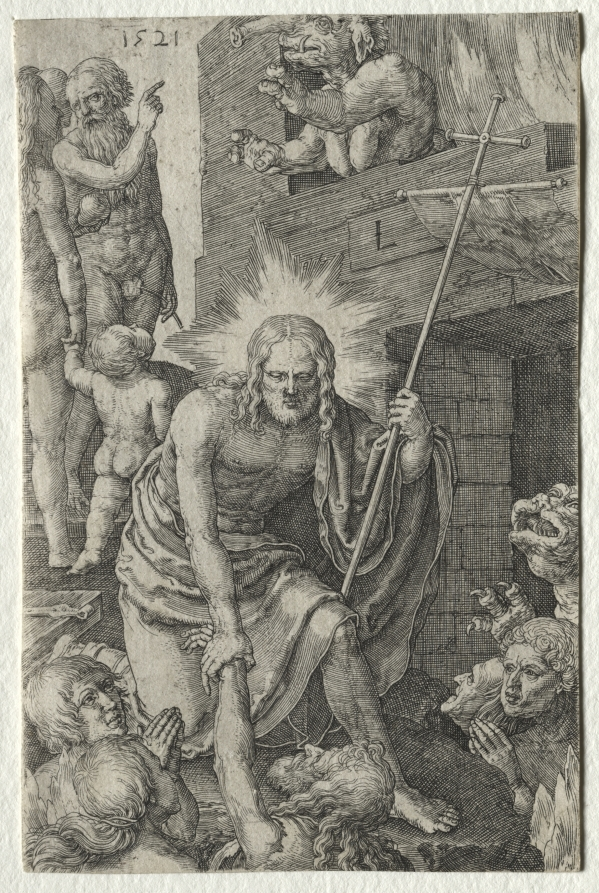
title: The Passion: Descent into Limbo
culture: Netherlands, 16th century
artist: Lucas van Leyden (Netherlandish, 1494–about 1533)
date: 1521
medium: engraving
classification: Print